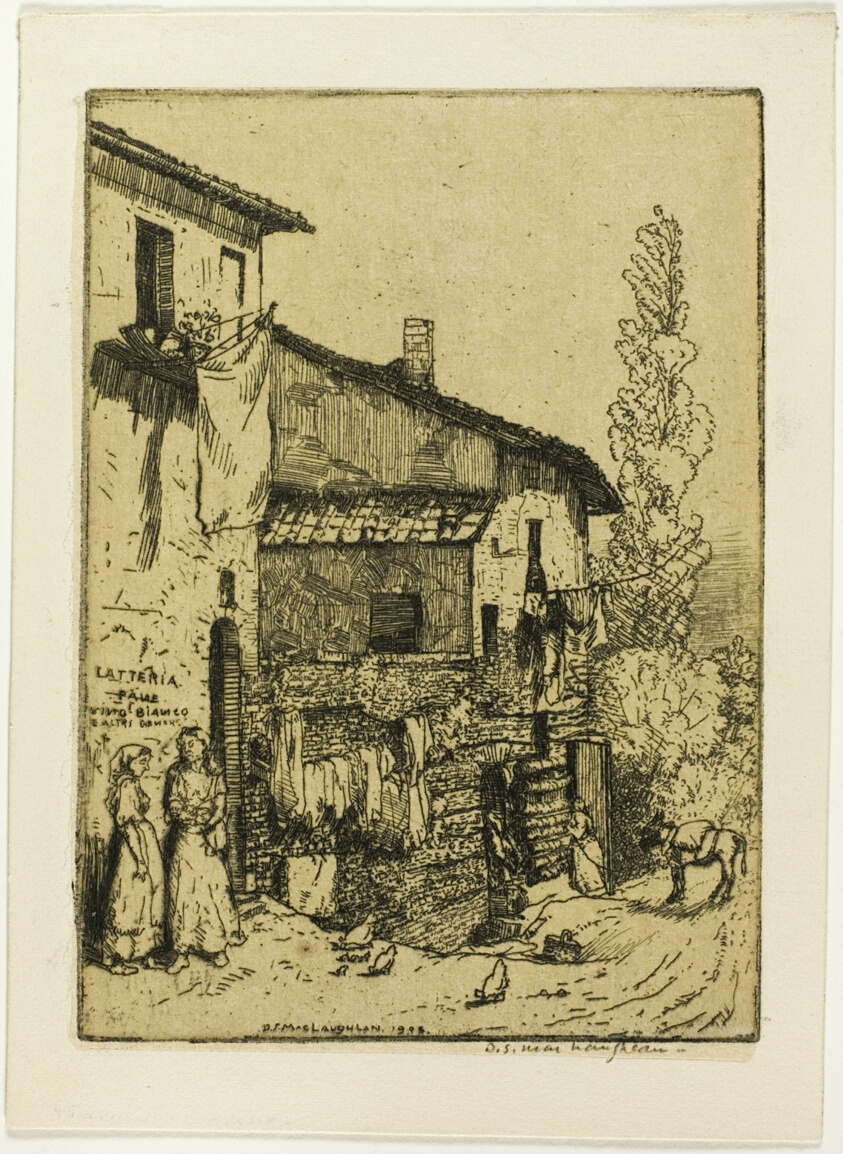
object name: Print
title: Siena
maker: Donald Shaw MacLaughlan (American, born Canada, 1876-1938)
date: 1905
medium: Etching in black on buff wove paper, laid down on cream wove paper (chine collé)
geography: United States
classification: etching; print; prints and drawing